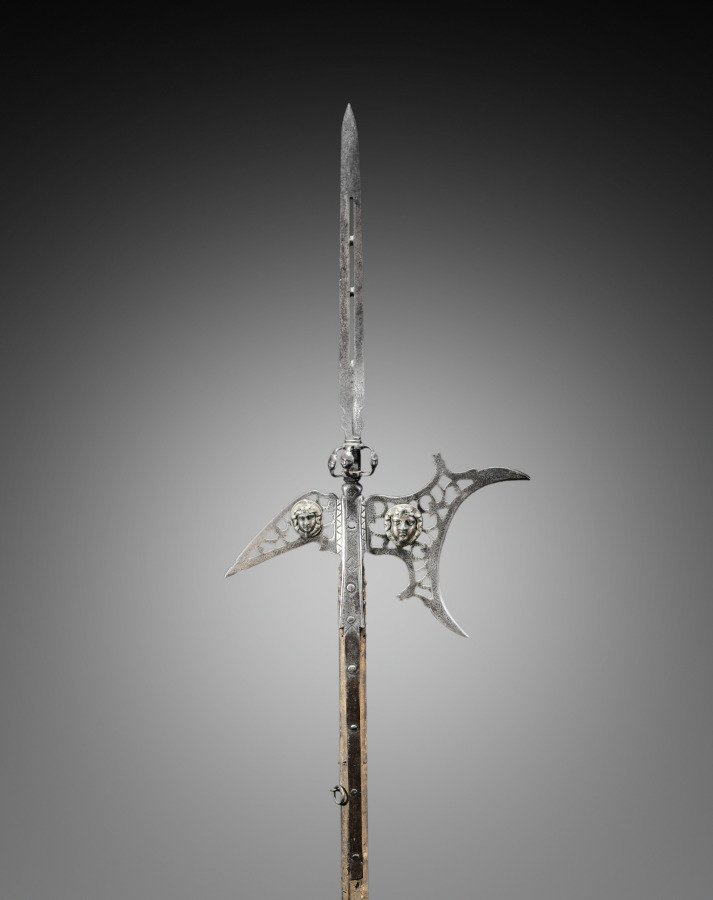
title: Halberd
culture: France, early 17th century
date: c. 1600–25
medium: steel, pierced; appliqué masks in brass; octagonal wood haft with studs and leather straps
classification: Arms and Armor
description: The halberd was a staff weapon favored by European infantries (foot soldiers) of the 1400s and 1500s for its versatility and deadly effect. The word halberd comes from the German words Halm (staff) and Barte (axe). The halberd is, in fact, an axe that served multiple functions: the axe blade was used for hacking, the spike for thrusting, and the beak for piercing plate armor or for pulling a knight from his saddle. The halberd was used by shock troops (those who lead an attack) and by Swiss and German mercenaries. After about 1550, the halberd gradually became less functional. Its large blade provided space for coats of arms and insignia. By the late 1500s, the parade halberd had become a ceremonial weapon for palace guards.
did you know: This highly decorative example would have been for ceremonial use only.